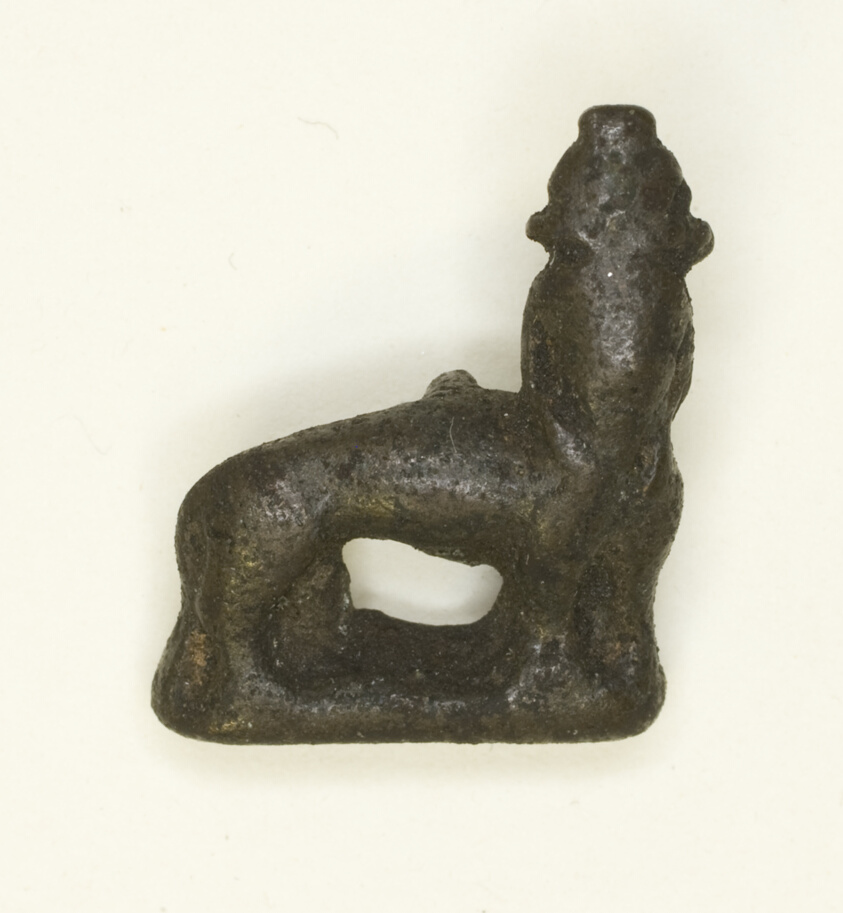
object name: Costume and Accessories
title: Amulet of the God Tutu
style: egyptian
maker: Egyptian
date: Roman Period (1st–3rd century)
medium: Bronze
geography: Egypt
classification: amulet; jewelry; bronze; metal; ancient art; costume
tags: gods (deities)